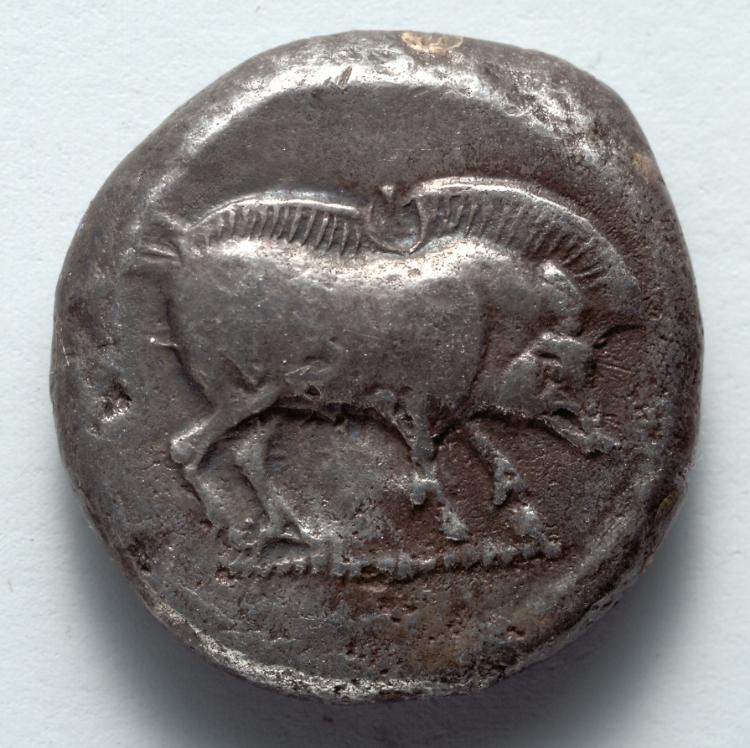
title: Stater: Boar (obverse)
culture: Greece, Lycia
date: 500–460 BCE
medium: silver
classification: Coins